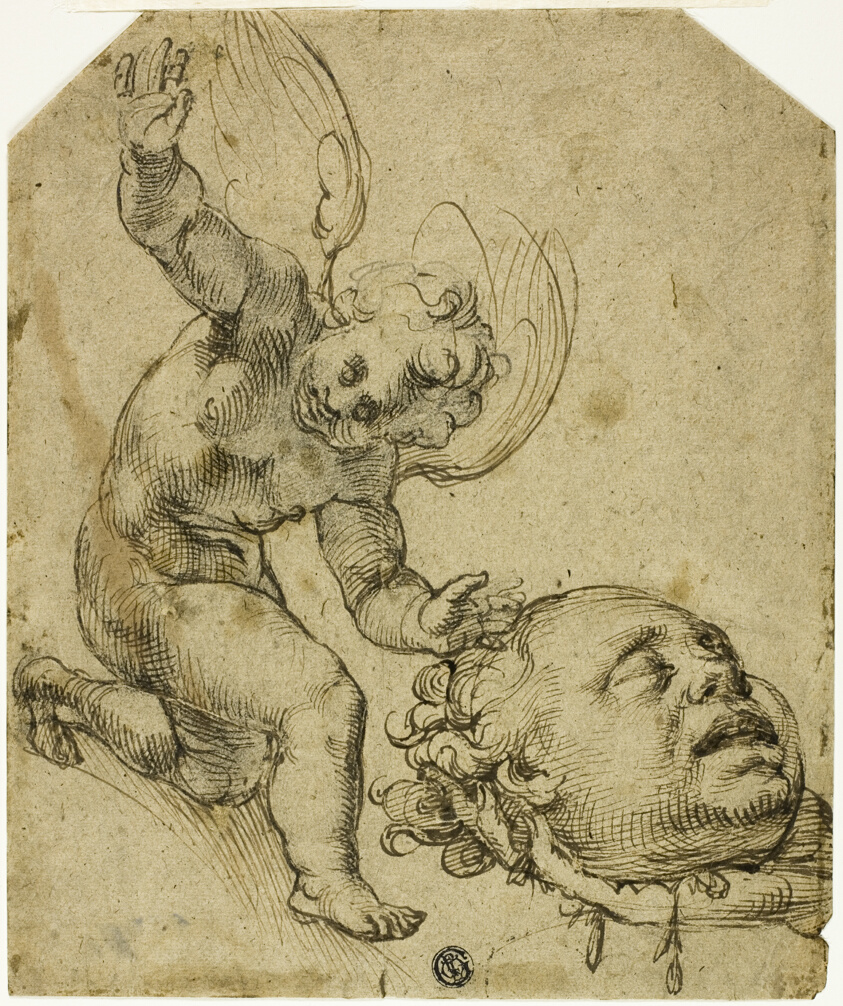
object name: Drawing and Watercolor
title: Two Sketches: Kneeling Putto Holding a Head (recto) Details of a Nude Male Child (verso)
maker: Bartolomeo Passarotti (Italian, 1529-1592)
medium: Pen and brown ink, with graphite, on buff laid paper, laid down on ivory wove paper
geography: Italy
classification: pen and ink drawings; drawings (visual works); prints and drawing